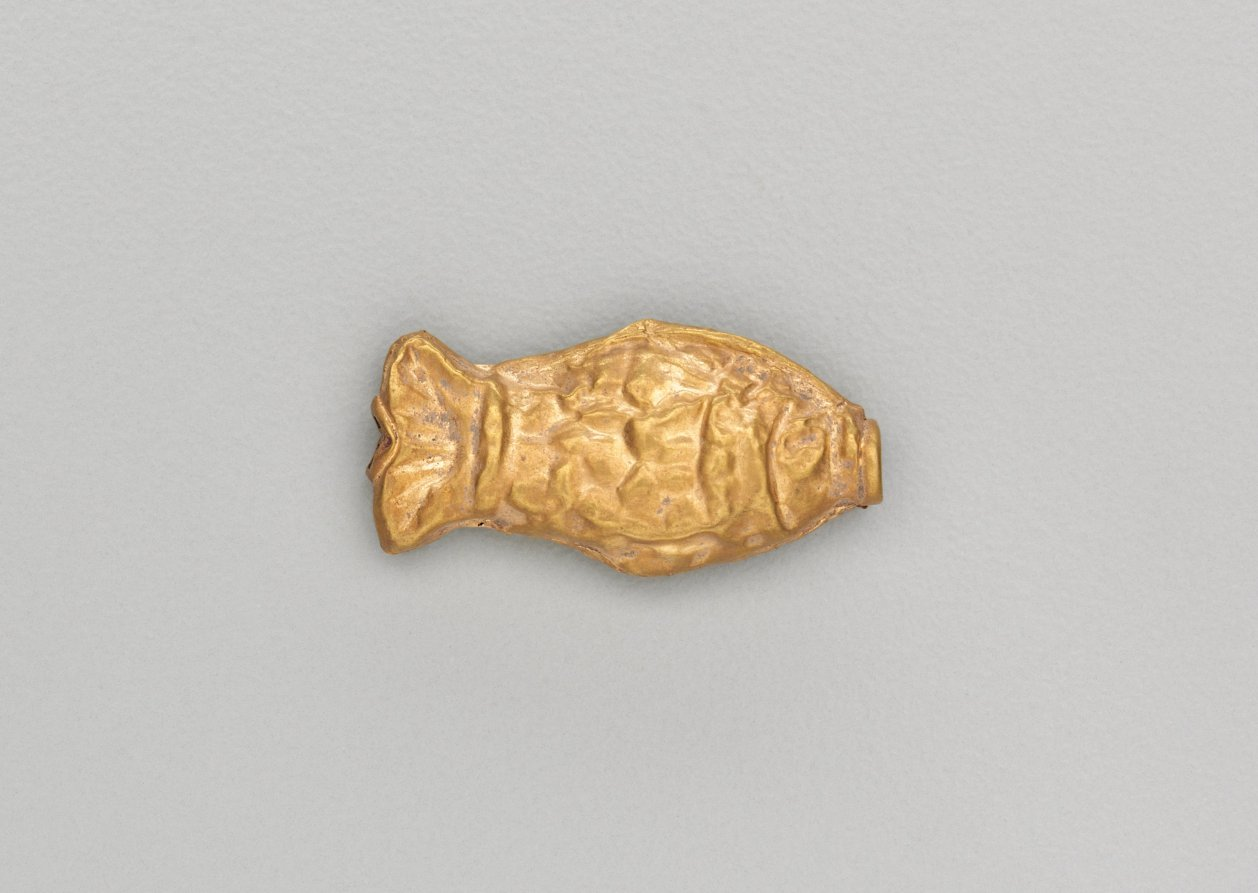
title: Necklace Bead in the Form of a Fish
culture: India, Shunga period (185–78 BCE)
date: 185–72 BCE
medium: gold repoussé with granulation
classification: Jewelry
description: Jewelry in ancient India often consisted of elements associated with water, such as fish and other aquatic plants and animals. Since water is essential for life, imagery that connotes water is life-affirming, or auspicious, and therefore appropriate adornment.